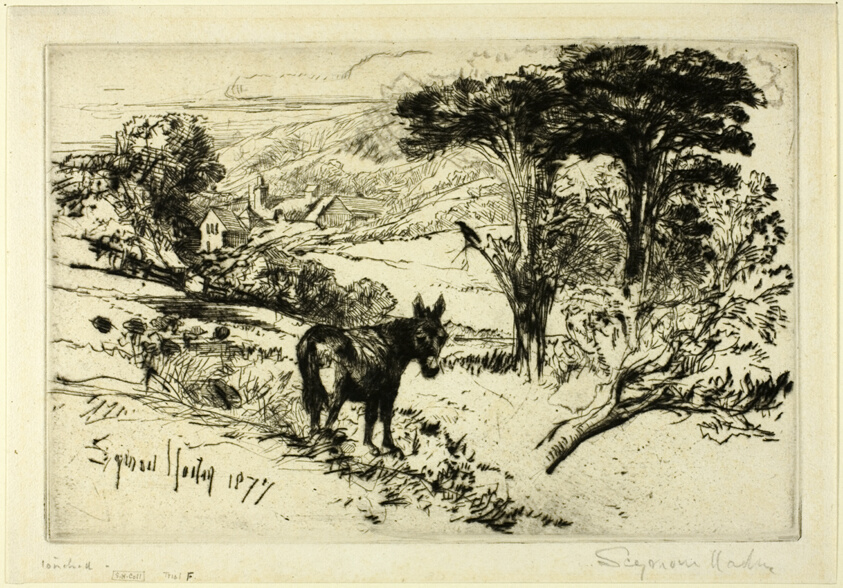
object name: Print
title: Challow Farm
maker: Francis Seymour Haden (English, 1818-1910)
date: c. 1877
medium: Drypoint on copper printed on ivory laid paper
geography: England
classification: drypoint; print; prints and drawing